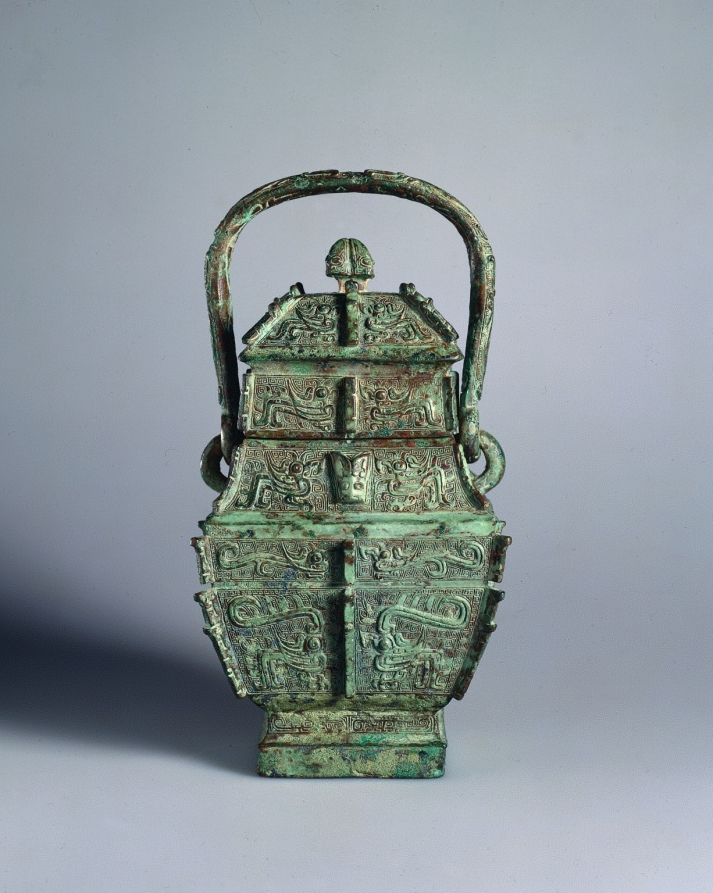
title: Square Wine Container (Fangyou)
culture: China, Henan province, probably Anyang, Shang dynasty (c. 1600–c. 1046 BCE), Anyang phase (c. 1250–1046 BCE)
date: c. 1250–1046 BCE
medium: bronze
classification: Metalwork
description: From the finely proportioned body to the elaborate decoration cast with great precision, this ritual wine vessel displays the artistic refinement and technical virtuosity that marked the full blossoming of late Shang bronze art. The dramatic contrast of the crested birds (kuifeng) against the dense background of spiral patterns (leiwen) gives the vessel a new force, clarity, and intense vitality. The distinctive square body also places it as a rare and important type among the more usual round or ovoid types.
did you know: The bird motif decoration of this bronze is uncommon; more often these bronzes are decorated with a combination of birds and dragons.